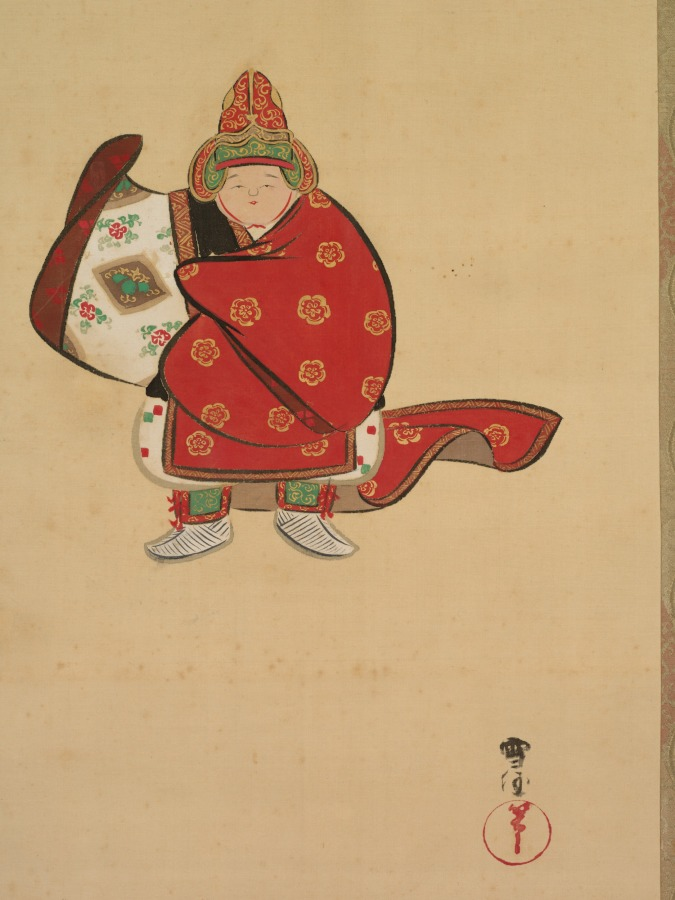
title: Bugaku Dancer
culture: Japan, Meiji period (1868–1912) to Shōwa period (1926–89)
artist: Kamisaka Sekka (Japanese, 1866–1942)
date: c. 1890–1942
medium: hanging scroll; ink and color on silk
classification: Painting